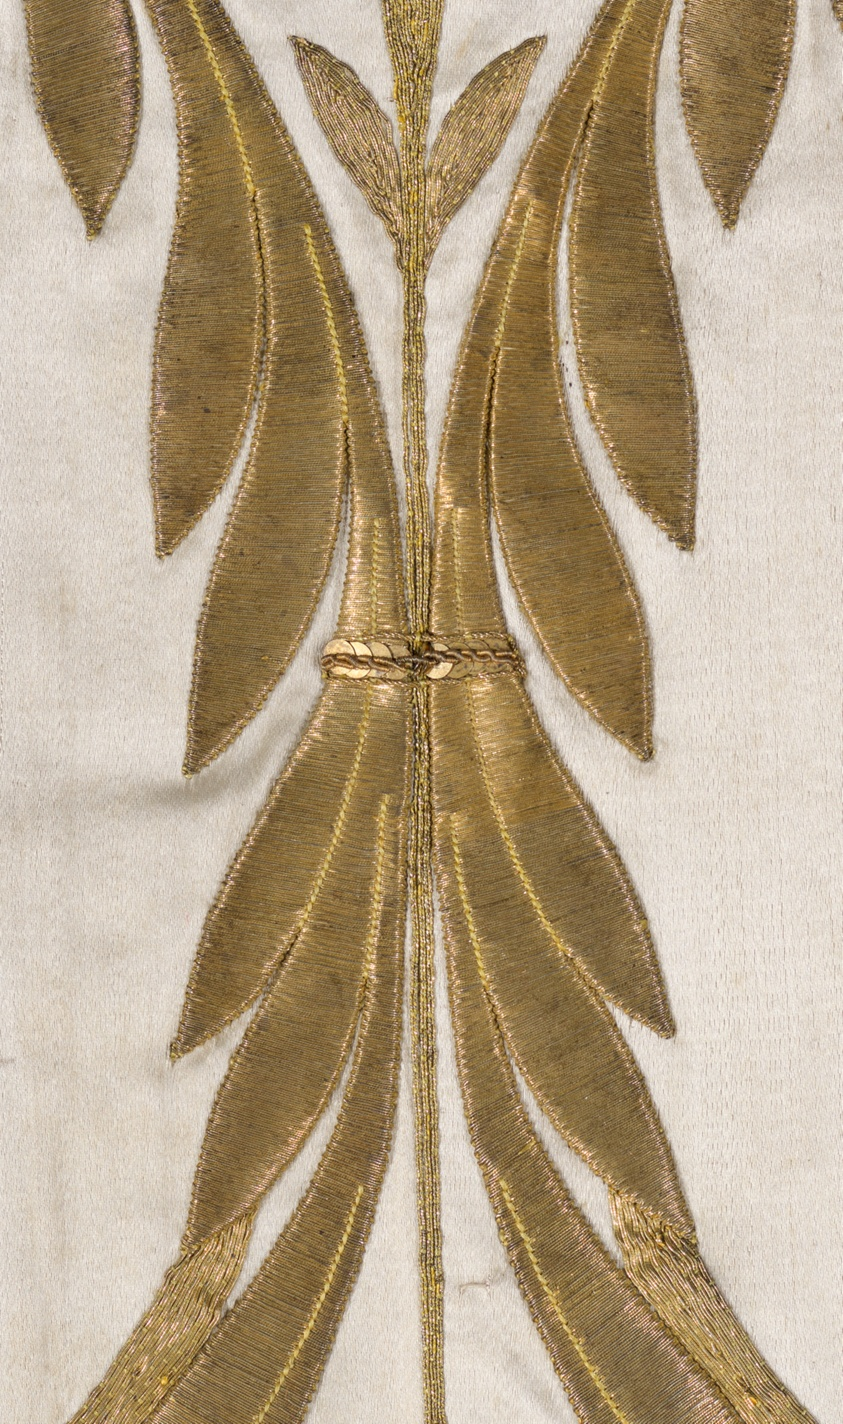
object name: Costume and Accessories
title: Skirt from a Court Gown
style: 19th century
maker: France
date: 1805-15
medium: Silk, satin weave; embroidered with gold metal-wrapped over a silk fibre core, gold frisé, silk, gold metal formed ornaments, "purl," spangles, gold metal strips; couching over paper core and silk padding, in pattern and backstitch; trimmed with bobbin lace made of gold metal strip wound around a silk fibre core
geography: France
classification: textile; needlework (visual works); costume; costume - embroidery; skirt (garment)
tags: lilies, flowers